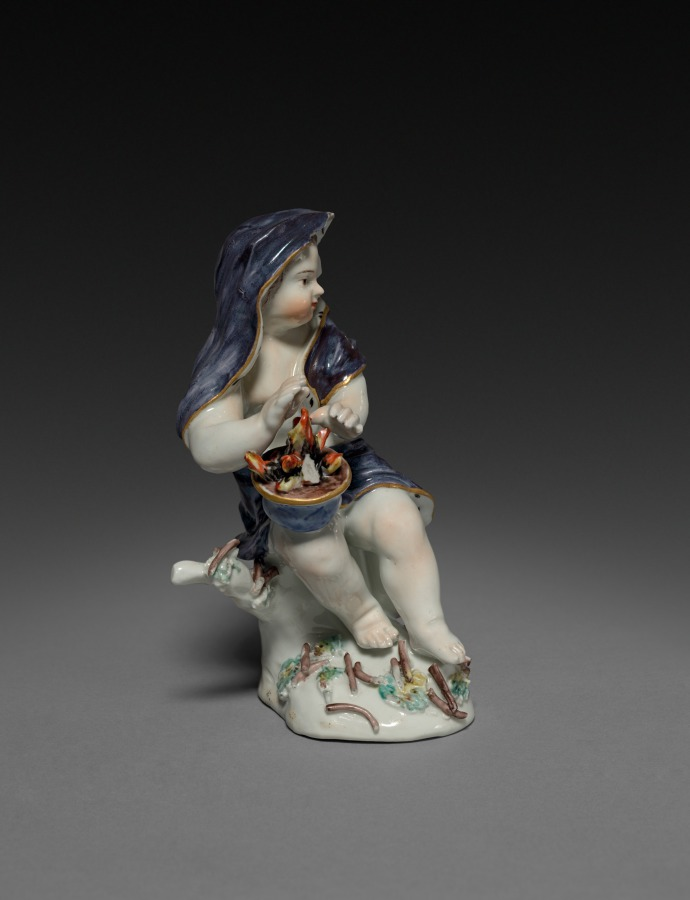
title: Winter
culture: England (Derby), 18th century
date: c. 1760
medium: soft-paste porcelain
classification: Ceramic